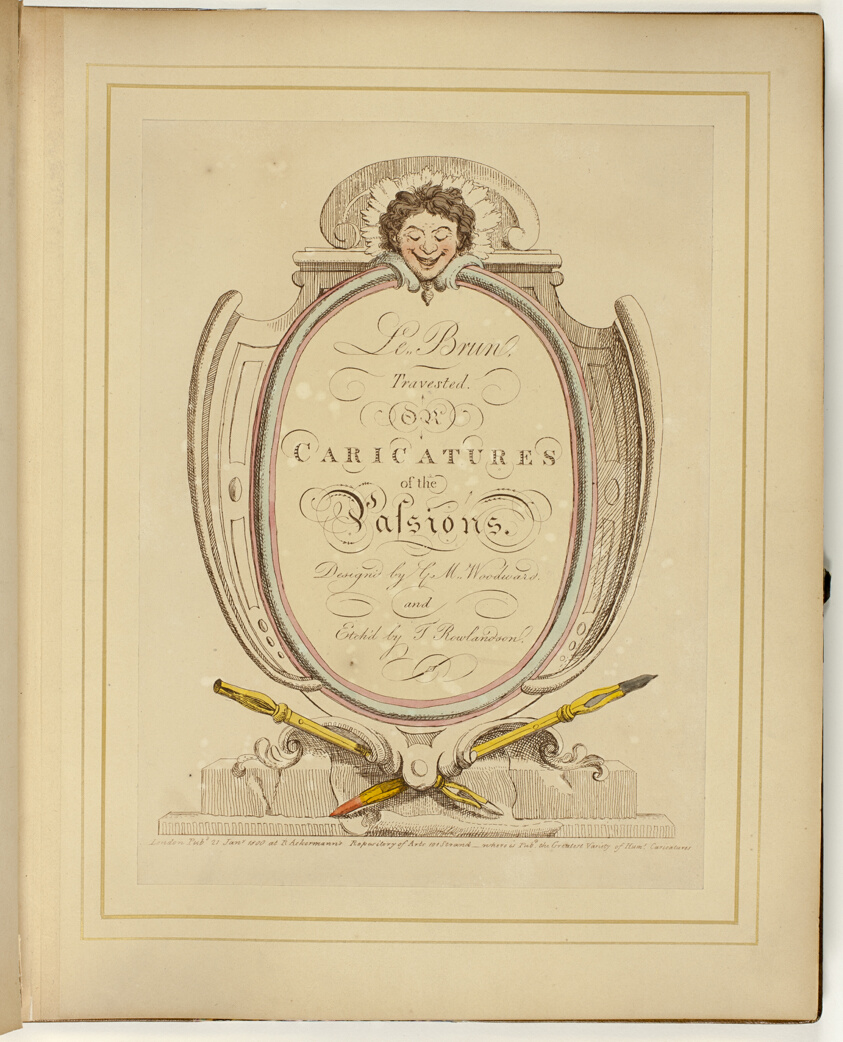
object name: Book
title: Le Brun Travested, or Caricatures of the Passions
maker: Thomas Rowlandson (English, 1756-1827); after George Woodward (English, c.1760-1809); and Franz Joseph Manskirch (1770-1830), after Thomas Rowlandson; published by Rudolph Ackermann (German, 1792-1834)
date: 1800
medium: Book with twenty hand-colored etchings and four aquatints in gray and black on cream wove paper, laid down on album sheets with gilt borders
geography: England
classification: etching; book; library/archives; prints and drawing